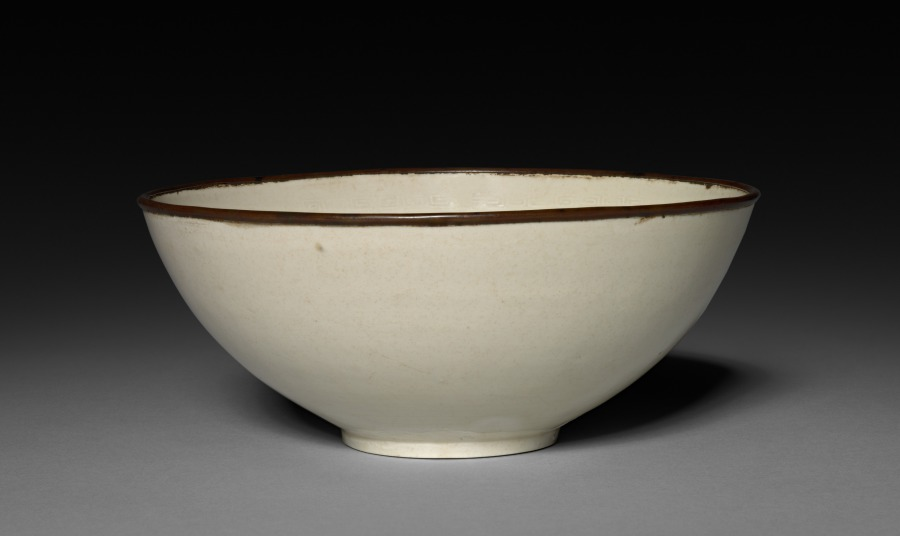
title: Bowl: Ding ware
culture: China, Jin dynasty (1115-1234)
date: 12th-13th Century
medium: glazed white porcelain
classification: Ceramic